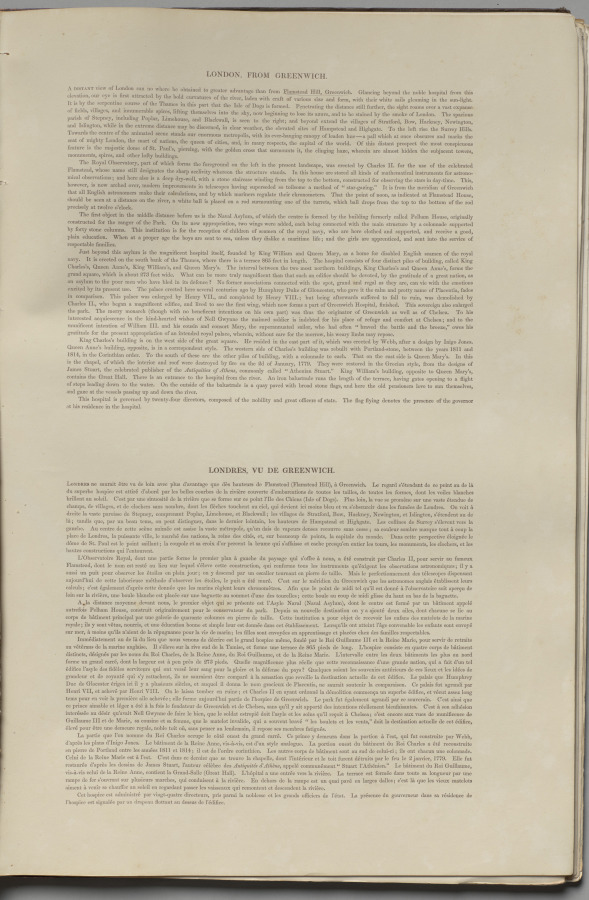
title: London As It Is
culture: England, 19th century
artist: Thomas Shotter Boys (British, 1803–1874)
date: 1842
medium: lithograph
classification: Bound Volume